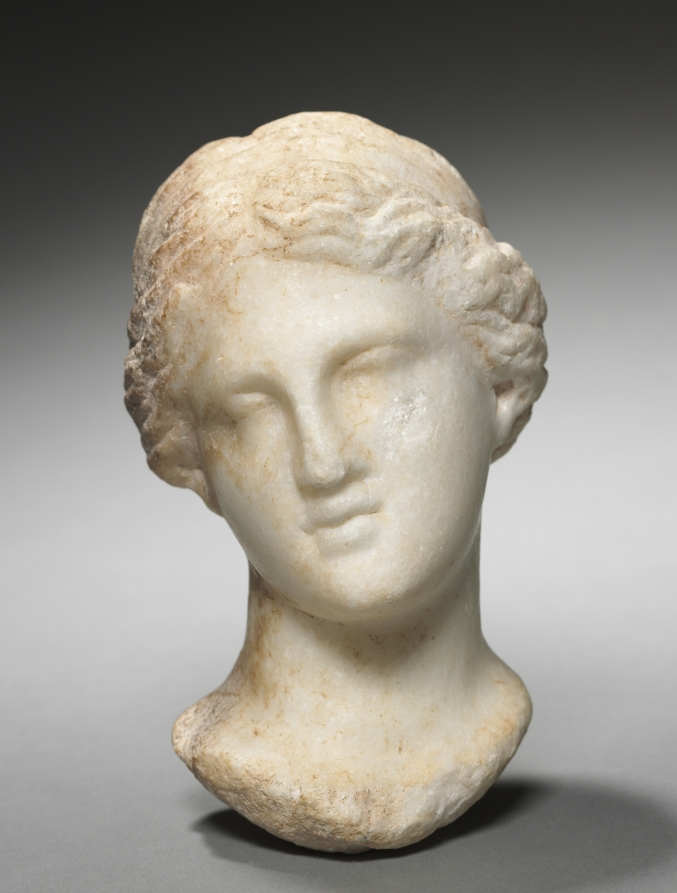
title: Head of a Woman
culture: Greece, Hellenistic period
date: 300–200 BCE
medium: marble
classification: Sculpture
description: The symmetry and proportions of this unidentified woman's portrait harkens back to the classical style made popular in the 4th century BC by the master Greek sculptors Praxiteles and Lysippos. Her center-parted wavy hair, rolled into an up-do, reflects the style of the later Hellenistic period when this work was made.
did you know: This hairstyle was achieved by rolling the hair and tucking it into the band behind the ears.